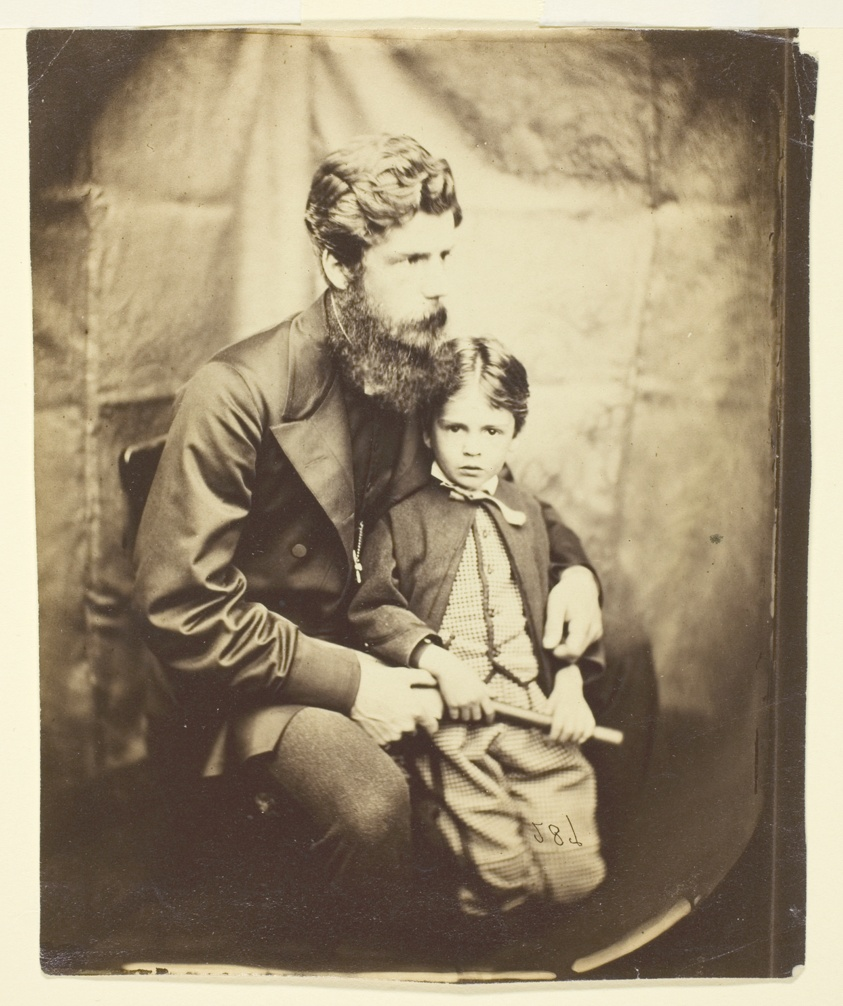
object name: Photograph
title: Rev. James Langton Clark and son Charles (Robin)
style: 19th century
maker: Lewis Carroll (Charles Lutwidge Dodgson); English, 1832–1898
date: 1864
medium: Albumen silver print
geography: England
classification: albumen silver print; photographic process; photography; photograph